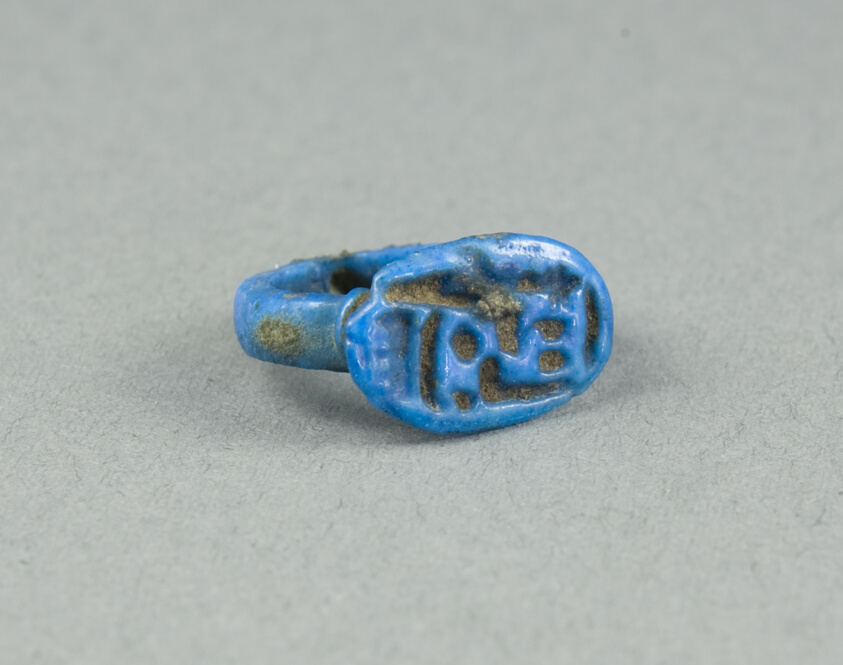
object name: Costume and Accessories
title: Ring: Amun-Ra, King of the Gods, the Lord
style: egyptian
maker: Egyptian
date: New Kingdom, Dynasties 18–20 (about 1550–1069 BCE)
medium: Faience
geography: Egypt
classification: ring (jewelry); ceramics; jewelry; ancient art; costume; faïence (composite material)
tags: gods (deities)